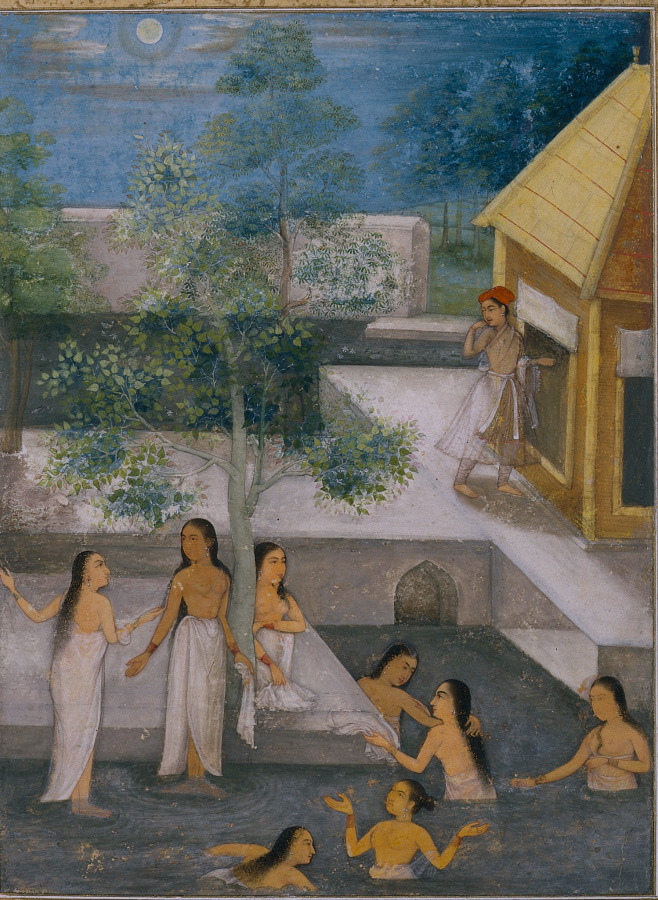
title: Leaf from the Late Shah Jahan Album: Harem Night-Bathing Scene (recto); Calligraphy Framed by an Ornamental Border of Flowers and Birds (verso)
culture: Mughal India, court of Shah Jahan (reigned 1628–58)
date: c. 1650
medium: Gum tempera, ink, and gold on paper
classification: Painting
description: The subject of women bathing persisted throughout the 1500s and into the 1600s. Akbar’s grandson Shah Jahan—the Mughal emperor who built the Taj Mahal—continued to support the work of artists in the imperial atelier. His taste was more formal and subdued, without as much interest in illuminations of fantastic tales. This scene is a single painting mounted in an album. The white marble terraces glow under the moonlight. An attendant carrying a cloth over one arm looks on with awe at the beauty of the scene. He is probably a eunuch, since men were not permitted to serve in the women’s quarters of a Mughal palace.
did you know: The lone male figure points to his mouth in a gesture of astonishment, perhaps at the beauty of the scene.